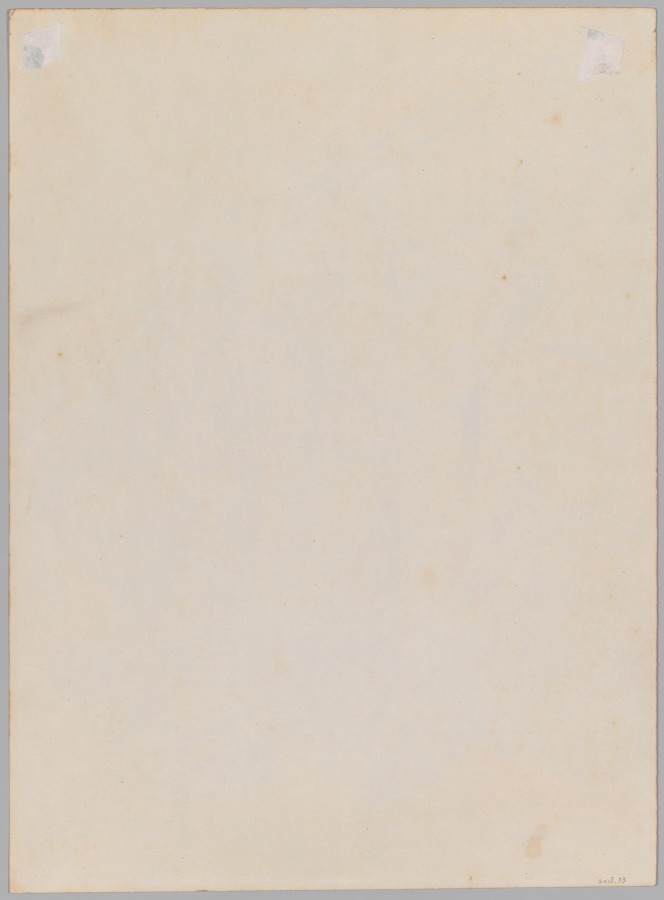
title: The Great Temple of Abu Simbel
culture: England, 19th-20th century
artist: Walter Frederick Roofe Tyndale (British, born Belgium, 1855–1943)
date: before 1943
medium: Watercolor and wash, with white highlights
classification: Drawing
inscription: Lower left, in brown watercolor: Walter Tyndale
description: The British artist Walter Frederick Roofe Tyndale made repeated trips to Egypt beginning in the late 19th century. While there, he was inspired by the Abu Simbel temples, seen in this drawing, which feature relief portraits of Ramses the Great and his queen Nefertari. Here, Tyndale contrasted the massive temple with figures standing before it to give a sense of its epic scale.